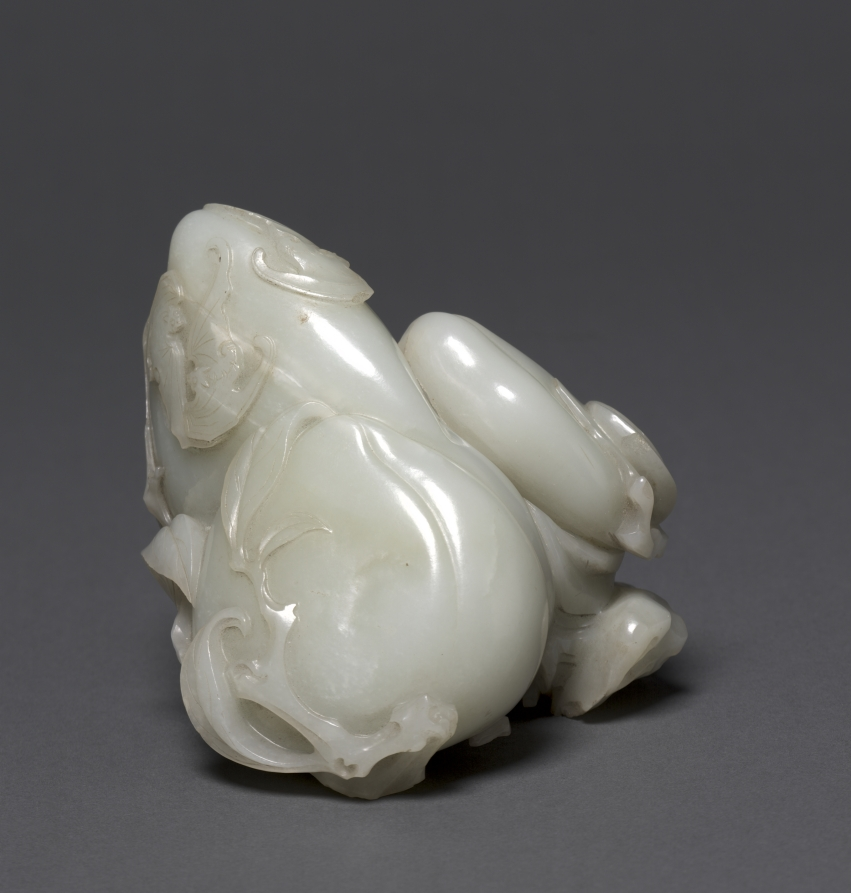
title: Peaches and Bats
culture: China, Qing dynasty (1644–1911)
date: late 1600s–1700s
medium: greenish-white jade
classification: Jade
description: This white jade is carved as a double peach with realistically detailed leaves and branch following the curve of the jade. Clinging to the edge are a pair of bats, which represent good fortune.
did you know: This jade sculpture was given to the museum in memory of John D. Rockefeller and his family.